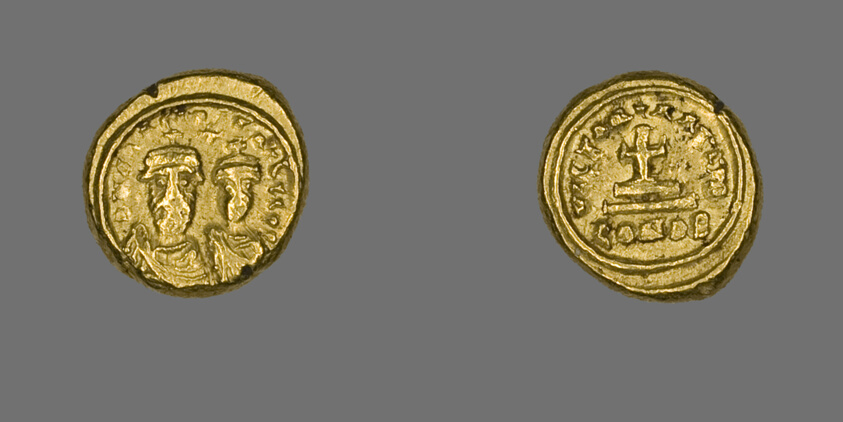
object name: Coin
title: Solidus (Coin) of Constans II and Constantine IV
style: byzantine, european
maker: Byzantine, minted in Constantinople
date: 659-668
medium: Gold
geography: Byzantine Empire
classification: coin; ancient art